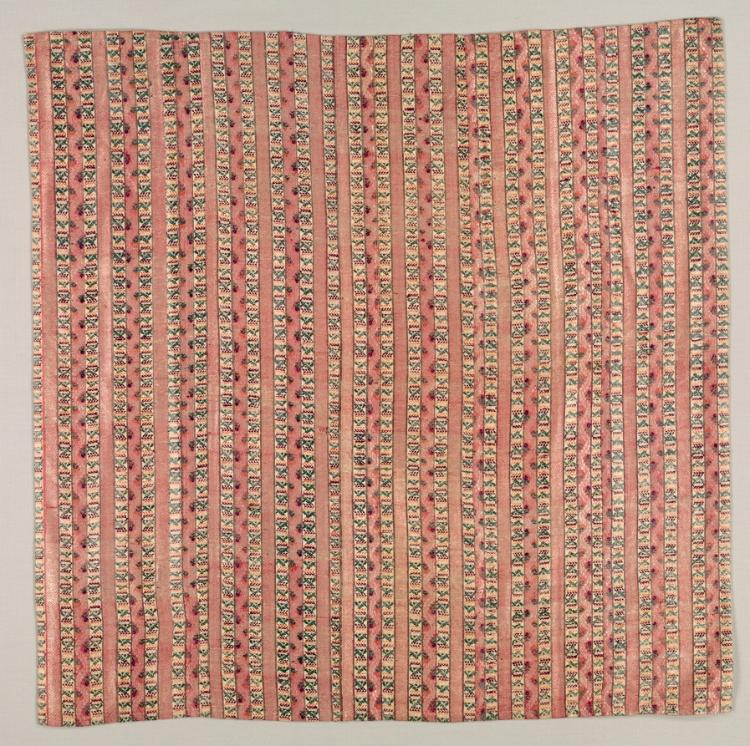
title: Textile Length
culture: Turkey, early 19th century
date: early 19th century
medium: brocaded silk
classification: Textile